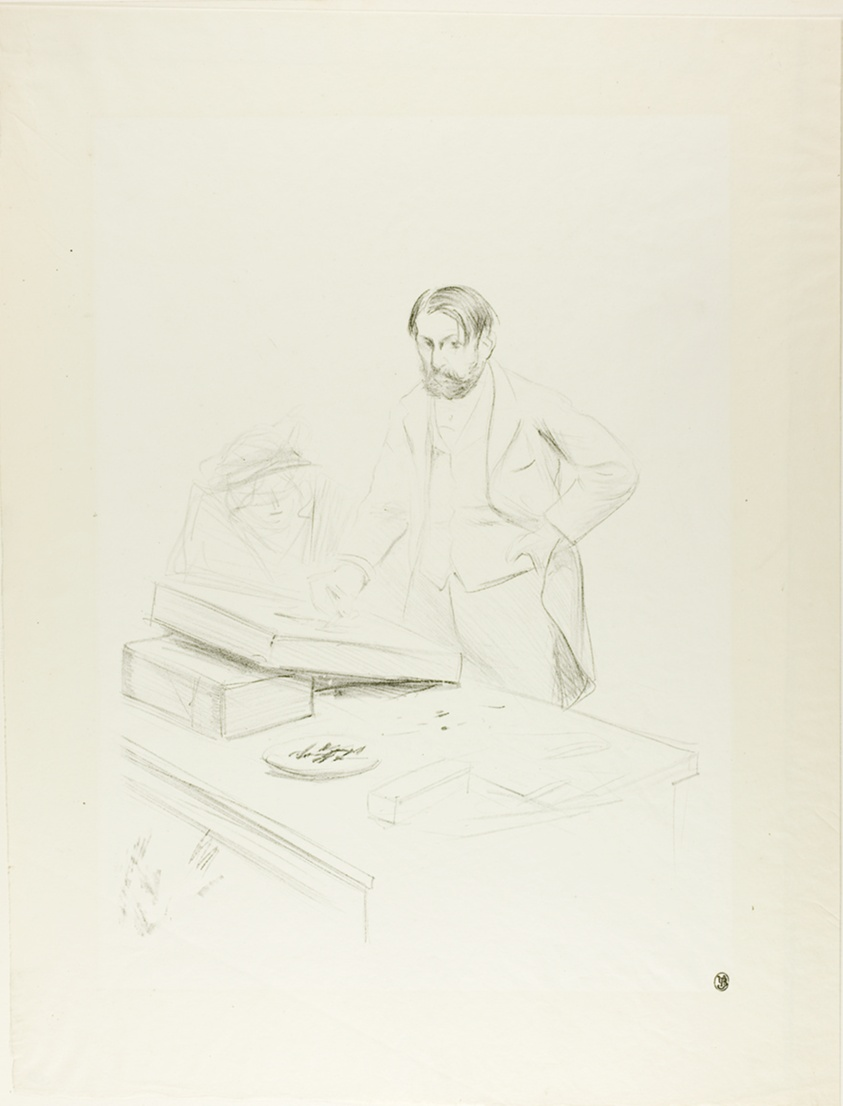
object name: Print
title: Forain, Lithographer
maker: Jean Louis Forain (French, 1852-1931)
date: c. 1895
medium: Lithograph on white vellum paper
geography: France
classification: lithograph; print; prints and drawing